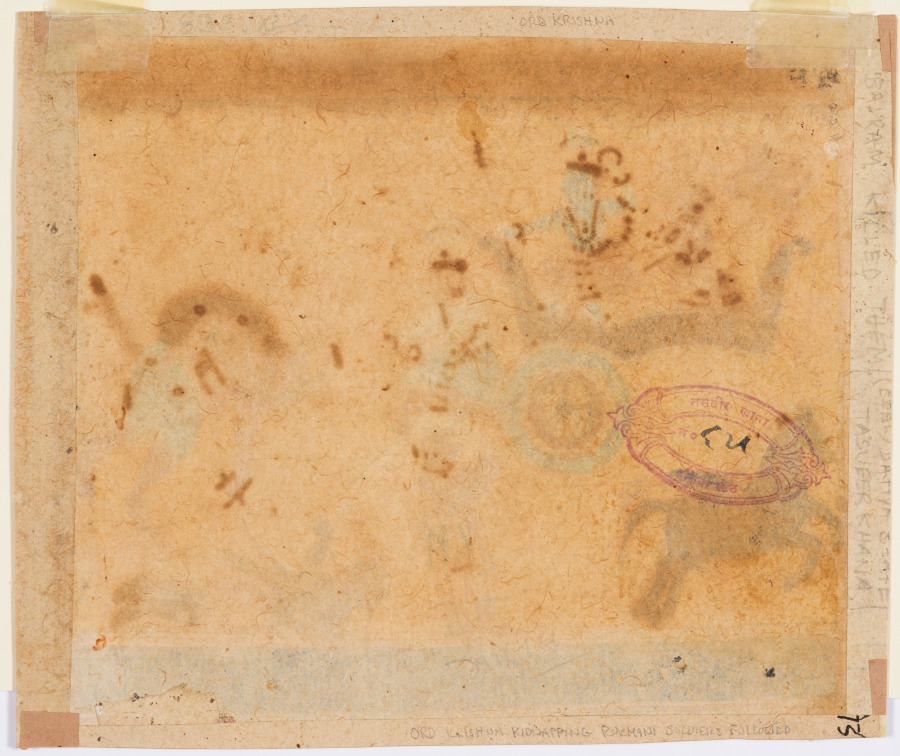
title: Abduction of Rukmini: Krishna Tied the Hands of Rukma, from a Bhagavata Purana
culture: Central India, Madhya Pradesh, Malwa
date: c. 1640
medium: Gum tempera, ink, and gold on paper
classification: Painting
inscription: ṣrī krachasna rukumu baṃdhe balibhadra jū hātha chore. 70.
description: Krishna eloped with Rukmini against her brother Rukma’s will. Rukma, in the striped tunic (jama), soon chased him down and challenged him to a battle. Knowing that Krishna would murder her brother, Rukmini pleaded with Krishna to spare his life, so Krishna tied his hands with a piece of cloth, and Krishna’s brother Balarama later freed him.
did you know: The white Balarama slayed two of Rukma’s followers with his plow.